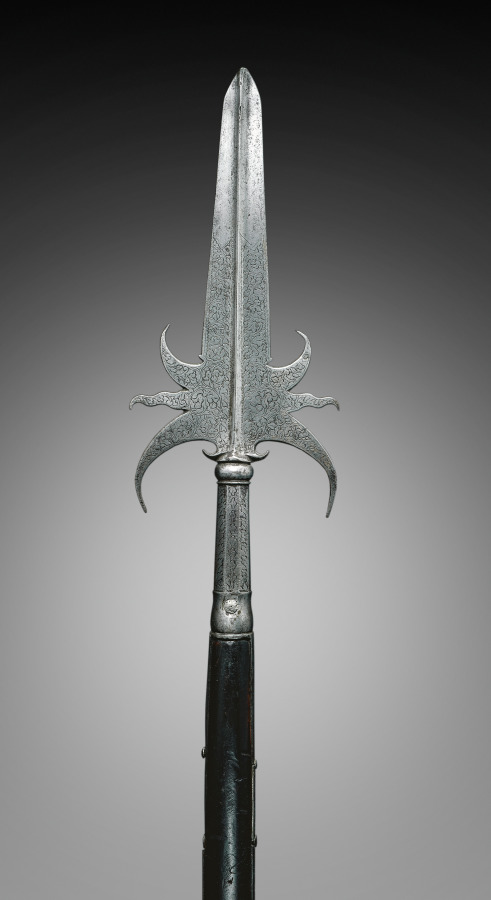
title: Partisan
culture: France, 17th century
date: c. 1650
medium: steel; round wood haft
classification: Arms and Armor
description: The partisan, a staff weapon with a symmetrical head, was carried by infantry officers and members of princely bodyguards during the 1600s and 1700s.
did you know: The ceremonial use of staff weapons continues to this day by the Swiss Guards at the Vatican.